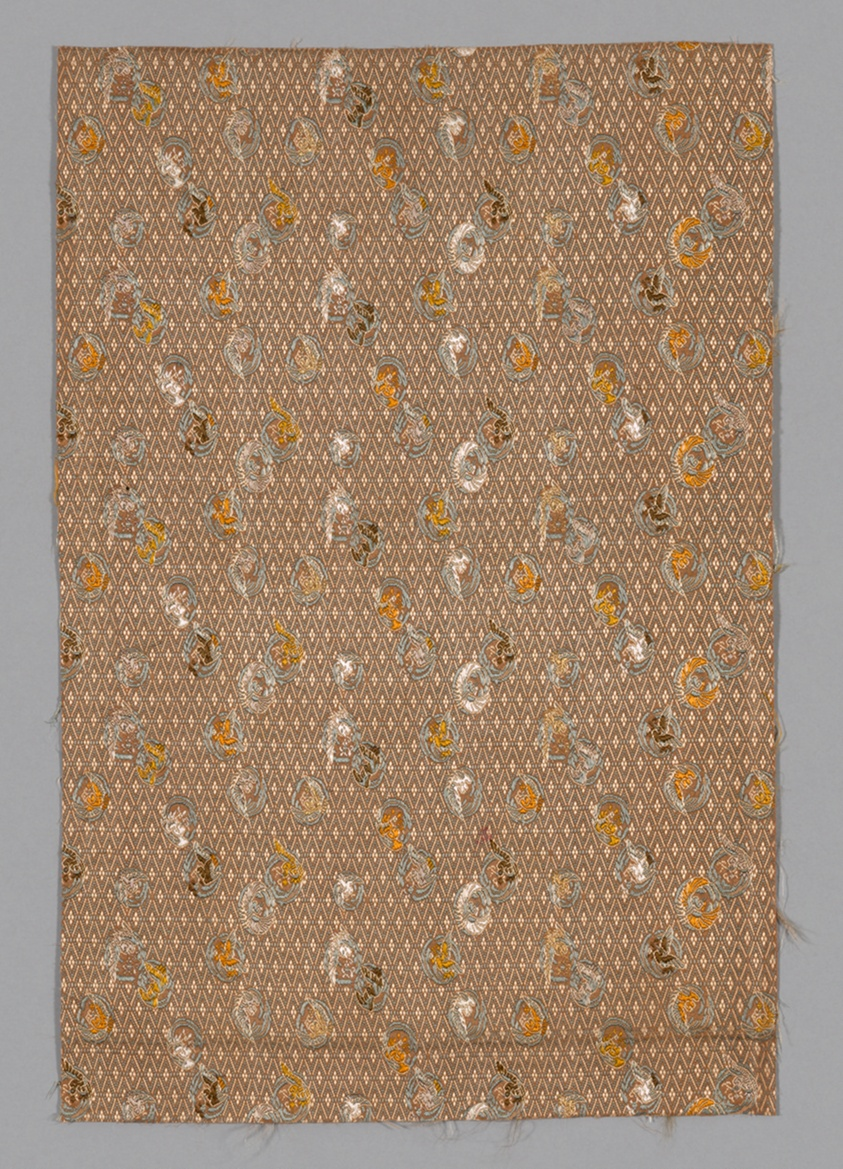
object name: Textile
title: Fragment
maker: Japan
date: 19th century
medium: Plain compound satin, silk and gilt paper on cotton (?)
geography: Japan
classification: textile; weaving